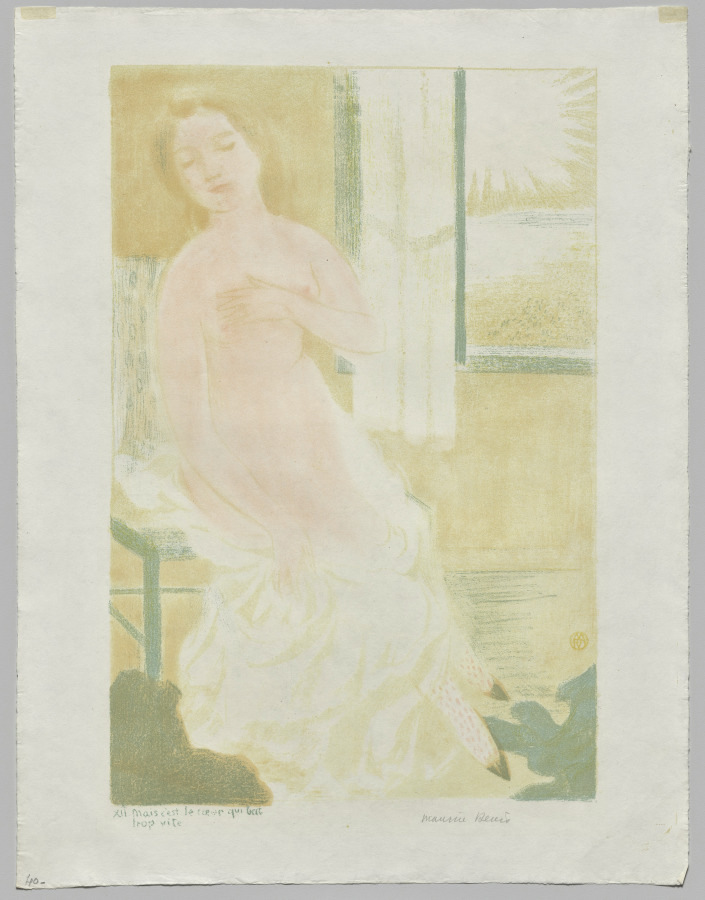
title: But It Is the Heart that Beats Too Fast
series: Love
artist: Maurice Denis (French, 1870–1943)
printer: August Clot (French, 1858–1936)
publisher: Ambroise Vollard (French, 1867–1939)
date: 1899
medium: color lithograph on wove paper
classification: Print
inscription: Recto, lower left: “XII Mais c’est le couer qui [illegible]/trop vite”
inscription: In graphite, recto, lower right: “Maurice Denis (signed)”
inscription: In graphite, recto, lower left: “[illegible number]”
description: Maurice Denis belonged to the Nabis, a group of artists who came together in 1889 to pursue a radical new style informed by subjective experience and emotion. This print is from a series in which Denis explored his devotion to his wife, Marthe, by depicting her in a variety of settings alongside titles drawn from his own journal. The vague but evocative images were meant to encourage the viewer to draw connections to the theme and meditate on its meaning.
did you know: Maurice Denis was a devout Catholic and often drew visual connections between his wife, Marthe, the subject of this print series, and the Virgin Mary.